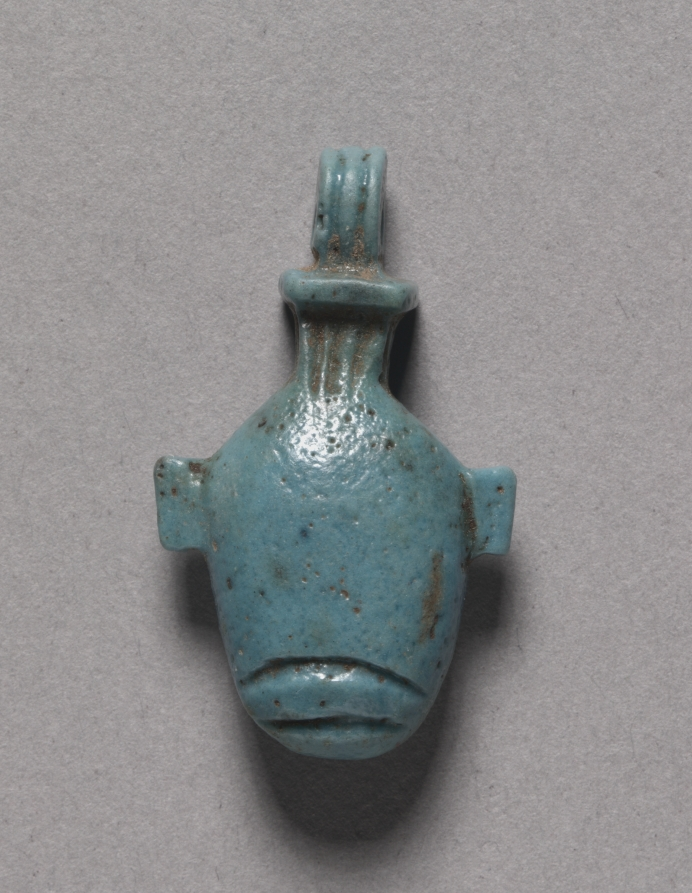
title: Heart Amulet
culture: Egypt, Third Intermediate (1069–715 BCE) or later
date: 1069–715 BCE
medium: deep turquoise-blue faience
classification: Amulets